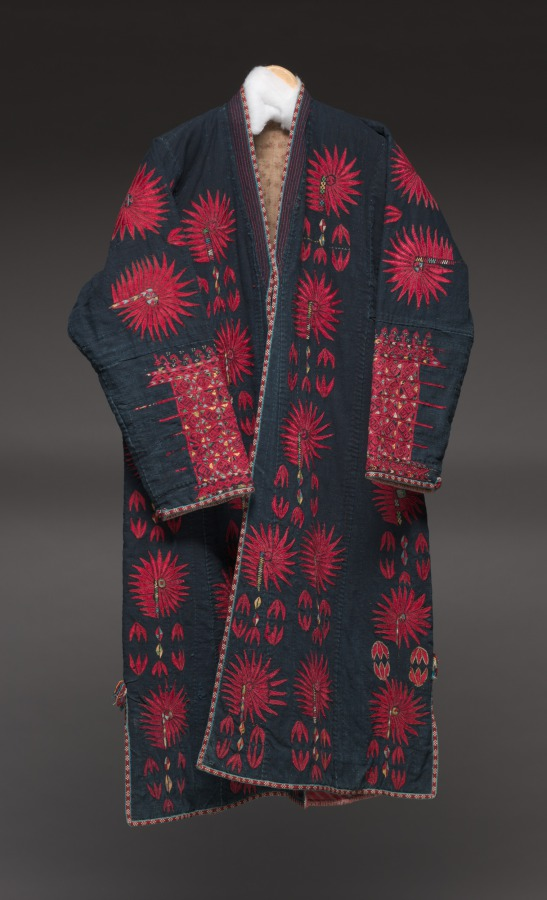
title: Woman's robe with crimson flora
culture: Uzbekistan, Karakapak Republic, Khorezm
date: late 1800s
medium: Plain weave: cotton (hand-spun, indigo dyed), embroidery: silk, cotton; tablet-woven (edges)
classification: Garment